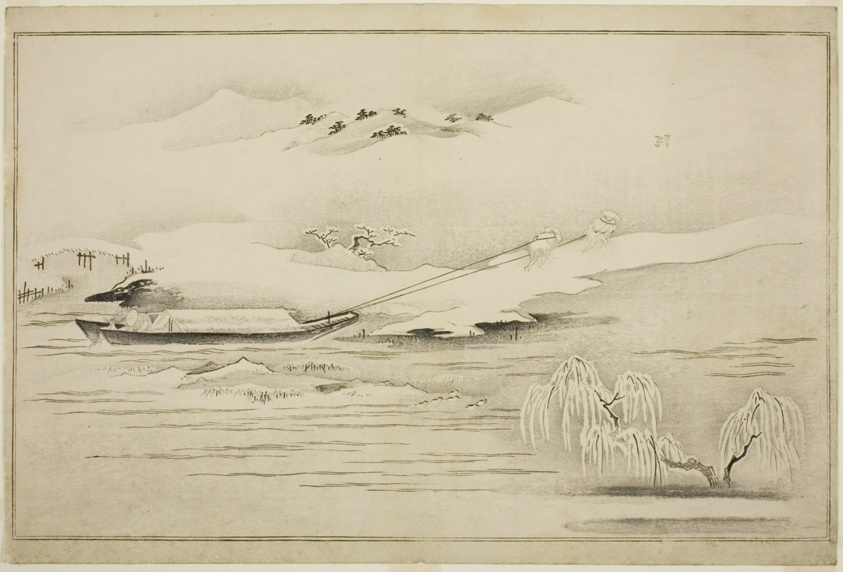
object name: Print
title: Towing a Barge in the Snow, from the album The Silver World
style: Japanese (culture or style)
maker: Kitagawa Utamaro (Japanese, about 1756-1806)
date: 1790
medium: Woodblock print; oban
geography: Japan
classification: print; asian art